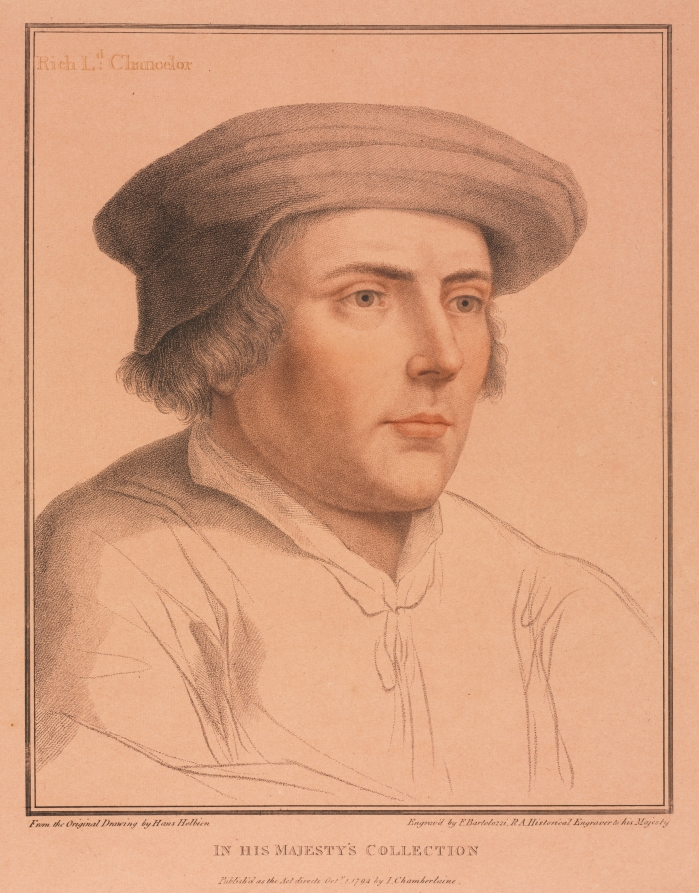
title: Lord Rich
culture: England, 18th Century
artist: Francesco Bartolozzi (British, 1727–1815)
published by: John Chamberlaine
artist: after Hans Holbein (German, c. 1465–1524)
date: 1794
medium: color stipple engraving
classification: Print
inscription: In pen and ink: "1794"